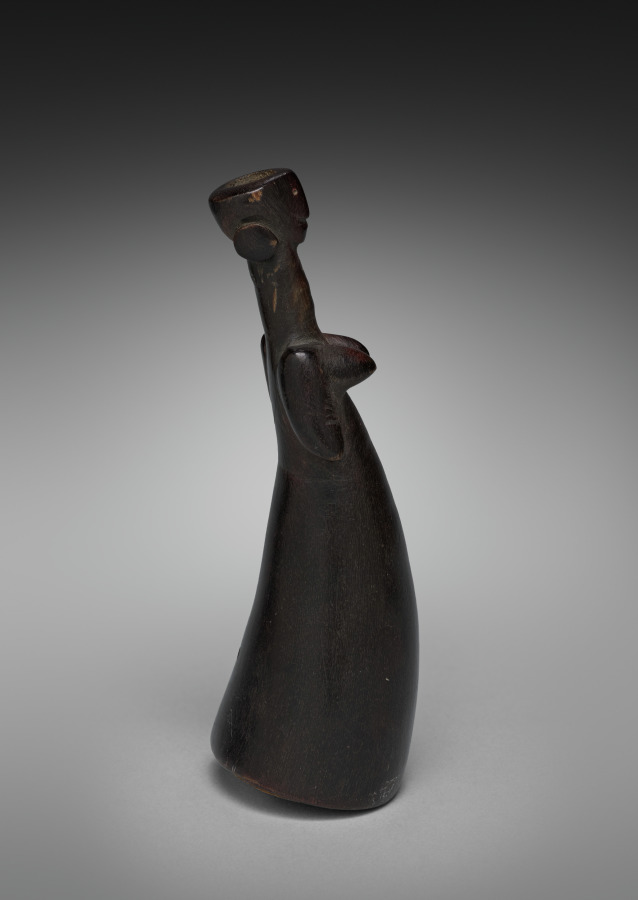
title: Snuff Container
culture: Africa, Southern Africa, Lesotho, South Sotho maker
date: 1800s-1900s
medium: Horn and wood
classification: Vessels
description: This snuff container in the form of a human (female) figure was carved from cattle horn. The form of the image follows the curve of the horn, with arms and hands held to the chest. Despite its smallish size and minimalist execution, this object demonstrates considerable expressive power. Cattle had special meaning for the pastoralist peoples of southern Africa in that it stood for the wealth and status of the individual and the group. However, similar to the ideas associated with tobacco and snuff, cattle also referred to the world of the ancestors. Snuff containers like this one had great significance for their owners and users.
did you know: The tobacco product snuff was stored in decorative, yet useful, containers like this one.